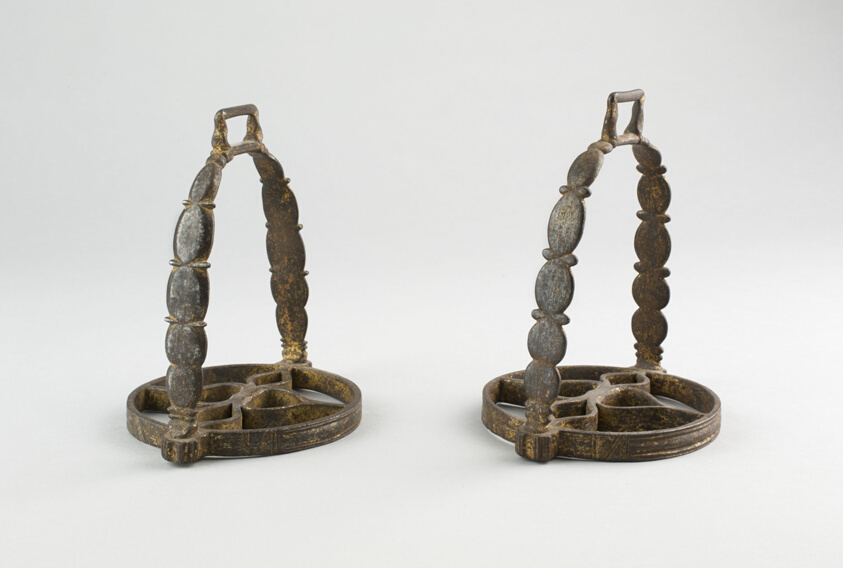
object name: Armor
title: Pair of Stirrups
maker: Flemish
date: 19th century (?) in 16th century European style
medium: Iron with gilding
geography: Flanders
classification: horse equipment; armor; arms and armor